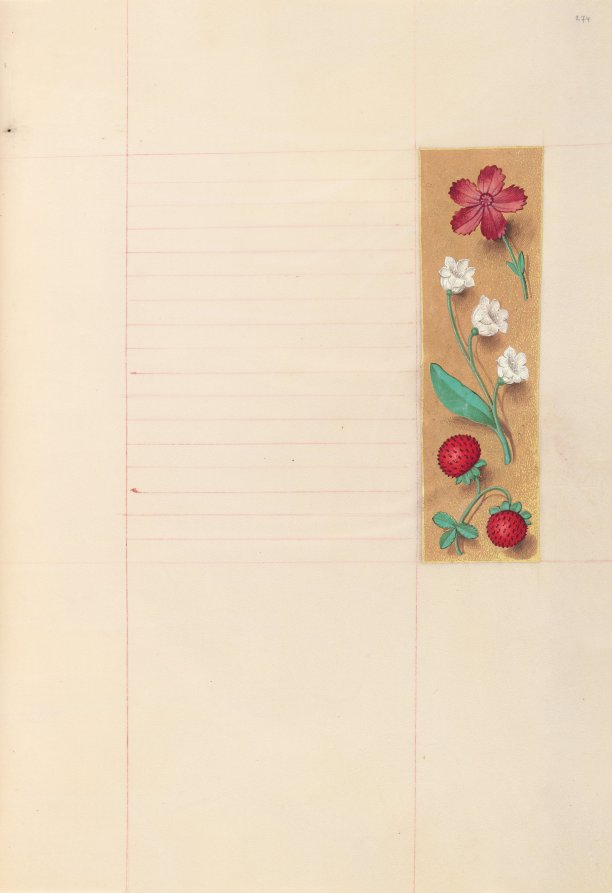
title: Hours of Queen Isabella the Catholic, Queen of Spain: Fol. 274r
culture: Flanders, Ghent and Bruges, late 15th century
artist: Master of the First Prayerbook of Maximillian (Flemish, c. 1444–1519)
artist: and Associates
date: c. 1500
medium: ink, tempera, and gold on vellum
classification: Bound Volume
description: This manuscript was illuminated by a circle of at least five highly organized manuscript painters active in the Flemish cities of Ghent and Bruges. The principal illuminator was Alexander Bening, who painted the majority of the book's miniatures. Manuscripts produced by this circle of artists are renowned for the decoration of their borders, which typically feature a rich variety of realistically-painted flowers, birds, and butterflies. This prayer book, called a book of hours, was intended not for a cleric, but for the private devotions of a lay person-in this case, Isabella the Catholic, Queen of Spain (1451-1504). Isabella's coat of arms embellishes the book's frontispiece. It is unlikely that the book was commissioned by the Queen herself; rather, she probably received it as a diplomatic gift from someone courting her patronage, perhaps Cardinal Francisco Jimenez de Cisneros. A Franciscan friar, Jimenez was dependent upon Isabella for his advancement, first to the post of Queen's confessor in 1492, and then to Archbishop of Toledo in 1495.